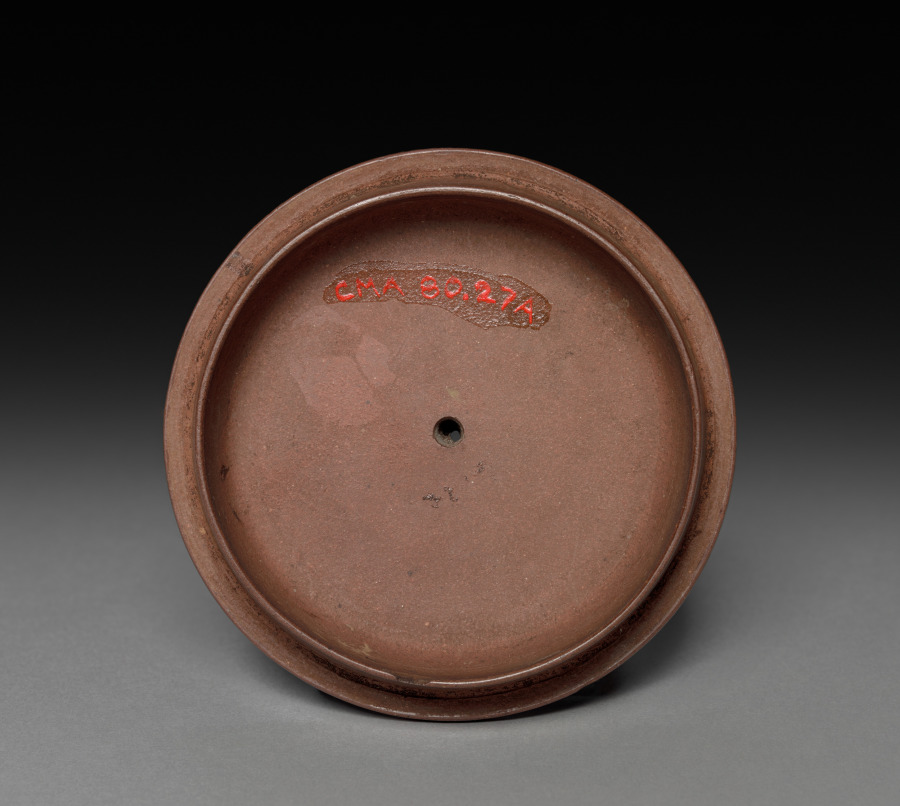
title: Teapot with Landscape and Imperial Poem (lid)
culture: China, Jiangsu province, Yixing, Qing dynasty (1644–1911), Qianlong reign (1736–95)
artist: Chen Hanwen (Chinese, active c. 1720s–90s)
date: 1762–95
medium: Stoneware, with gold pigment, Yixing ware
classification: Ceramic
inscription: 陳漢文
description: This teapot with a polished surface shows an imperial poem in gold on one side and a landscape on the other. The poem in archaic seal script was composed by the Qianlong emperor on his third southern inspection tour in 1762, when he traveled to southern China to solidify his rule. The base bears a stamped seal of its maker. Yixing potters produced teapots primarily for Ming dynasty literati-officials who valued simplicity and restraint, until the early Qing emperors introduced them at court.